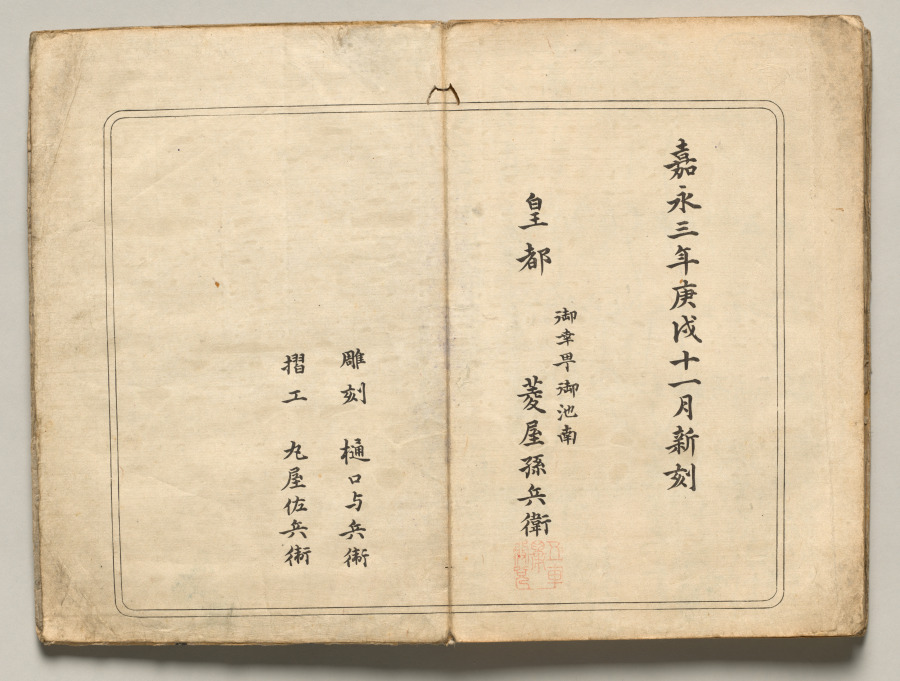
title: Publishing Information from Ōkyo Picture Book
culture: Japan, Edo period (1615–1868)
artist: after Maruyama Ōkyo (Japanese, 1733–1795)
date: 1850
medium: accordion-style woodblock-printed folding book; ink and color on paper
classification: Bound Volume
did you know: This impression of a book of woodblock-printed designs is missing a spread that depicts a crane.